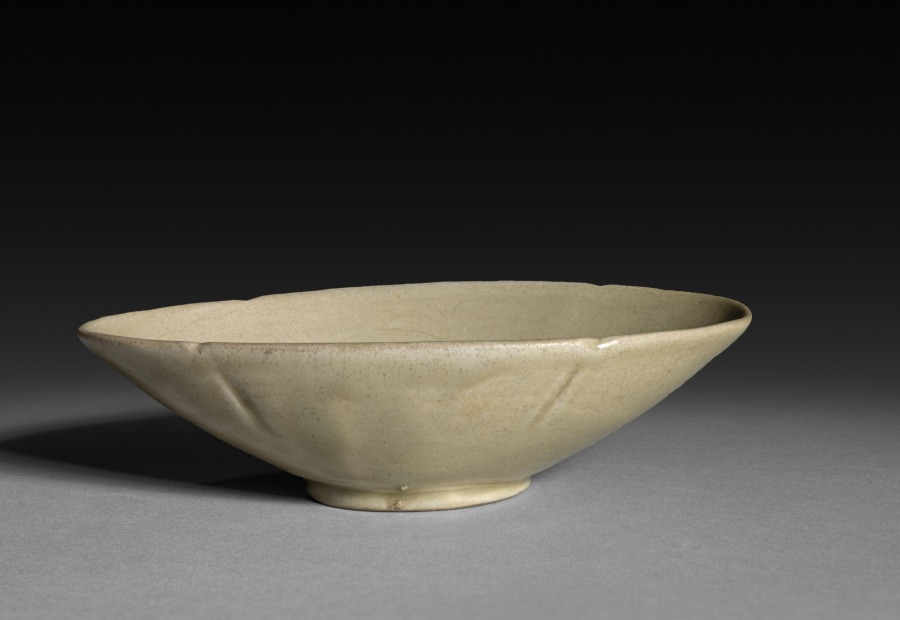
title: Chan: Oval Shaped Shallow Cup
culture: China, Tang dynasty (618-907) - Five dynasties (907-960)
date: 900s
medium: Glazed gray stoneware, Yue ware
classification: Ceramic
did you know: Four incised lines on the outside with indentations in the rim above suggest a petal form.